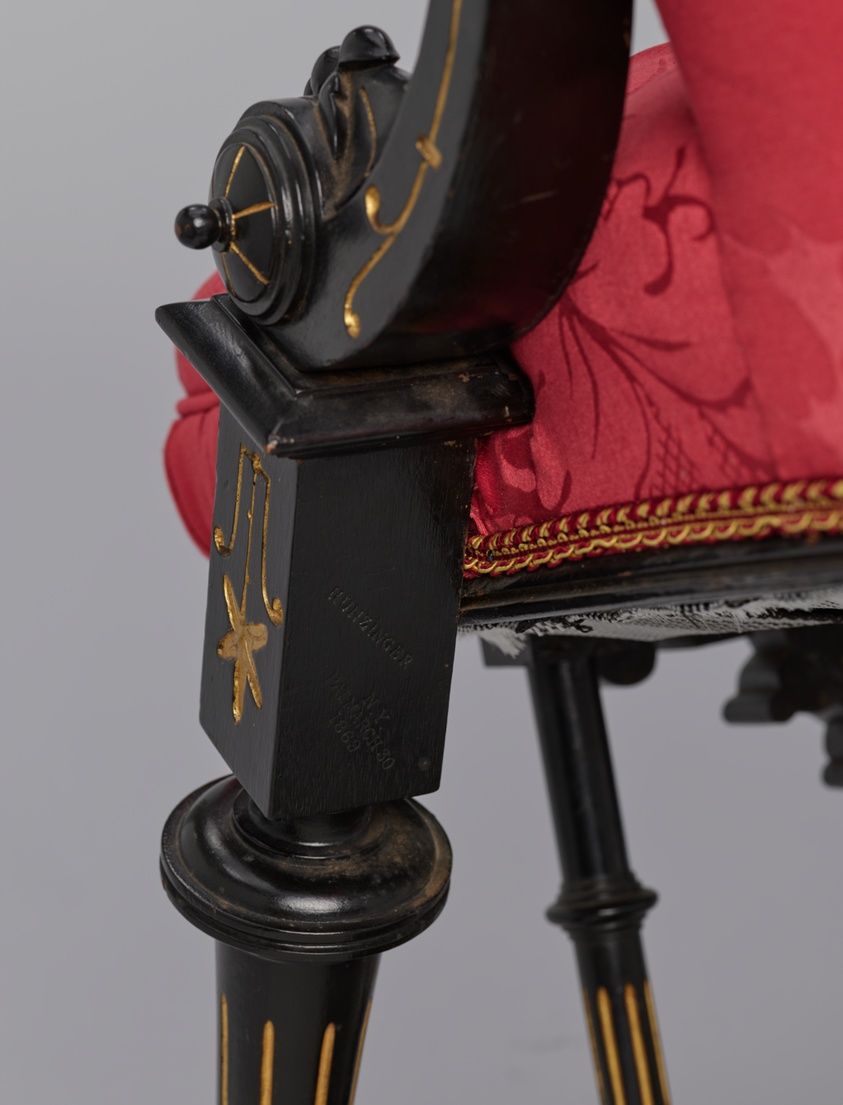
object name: Furniture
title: Armchair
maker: George Jakob Hunzinger (American, born Germany, 1835–1898)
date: About 1869; patented in 1869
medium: Ebonized walnut with gilt decoration and upholstery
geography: New York City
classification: seating; furniture; american decorative arts; american arts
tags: furniture